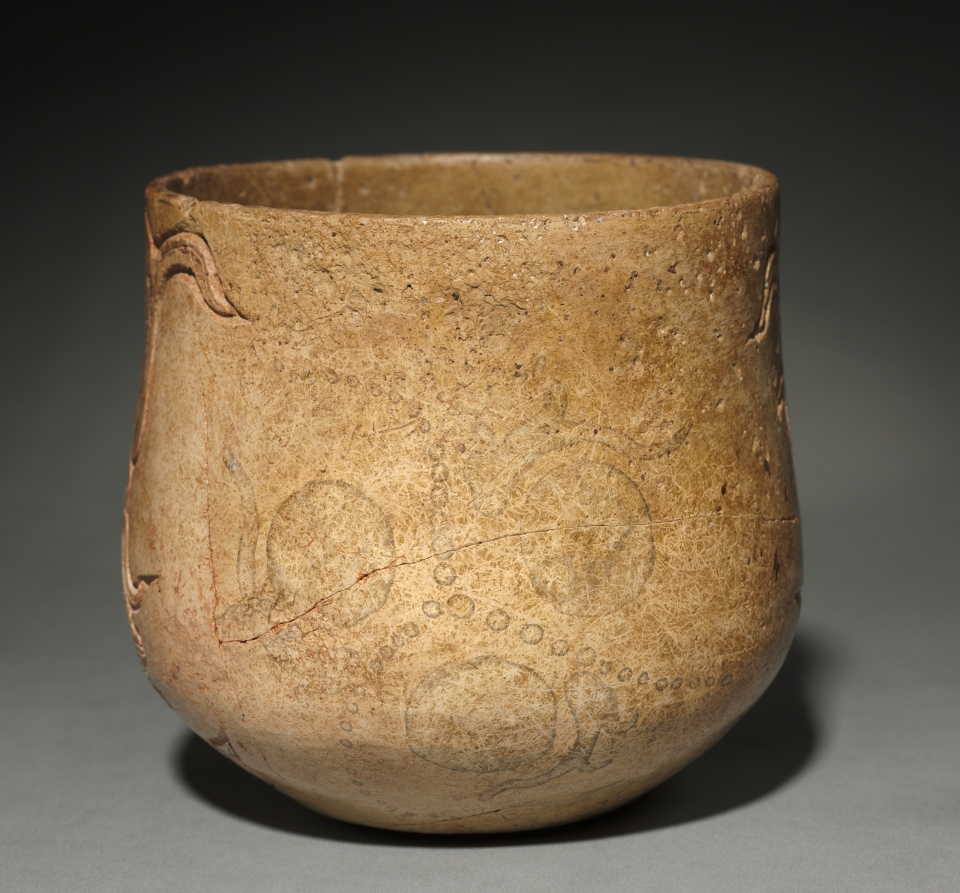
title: Carvel Vessel with an Underworld Diety (God L)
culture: Mexico, Yucatán Peninsula, Maya (Chocholá) style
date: 600–900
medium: earthenware, slip, pigment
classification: Ceramic